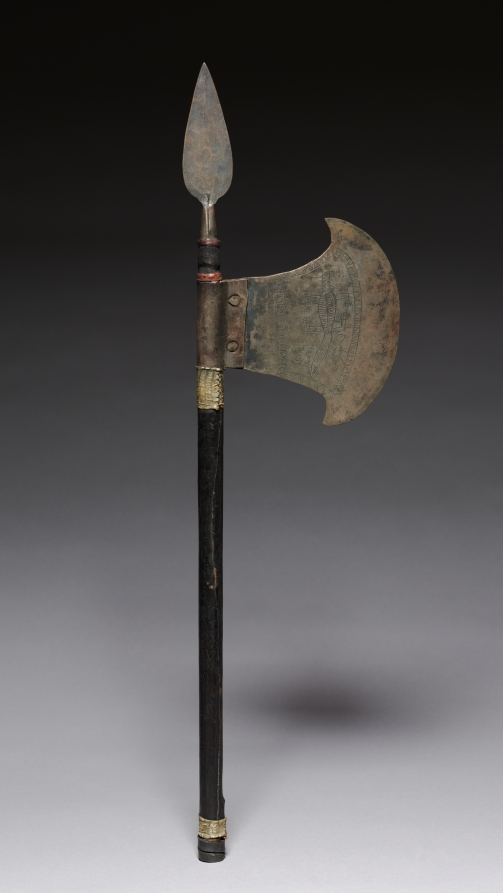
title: Axe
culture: Africa, unknown maker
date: 1900s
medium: iron and leather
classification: Arms and Armor